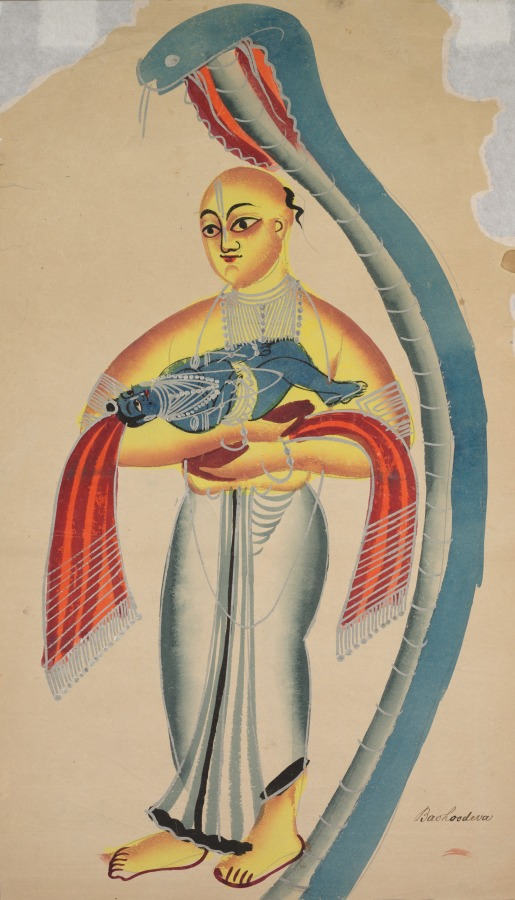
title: A Serpent Protects Vasudeva Taking His Infant Son Krishna to Safety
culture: Eastern India, Bengal, Kolkata, Kalighat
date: c. 1890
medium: Gum tempera, graphite, ink, and tin on paper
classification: Painting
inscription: [[lower right]] Bashoodeva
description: In the dead of night, Krishna was born to parents who were imprisoned by his evil uncle, the usurper King Kamsa. While a goddess compelled the guards to sleep, Krishna’s father, Vasudeva, in the middle of a storm, spirited the newborn to safety in a cowherd village, where he exchanged Krishna for another infant. In the morning, Kamsa murdered the infant he thought was the child of Vasudeva, and Krishna lived to be raised by the herders.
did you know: In the lower right, the name Vasudeva is written in the Bengali dialect as “Bashoodeva.”